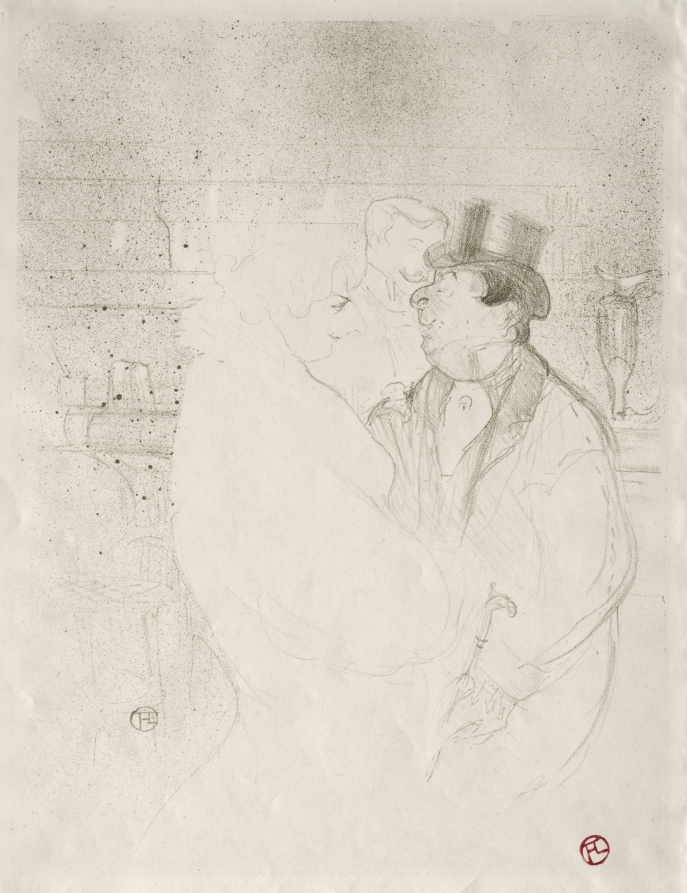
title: Ida Heath at the Bar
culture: France, 19th century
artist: Henri de Toulouse-Lautrec (French, 1864–1901)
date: 1894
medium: lithograph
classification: Print